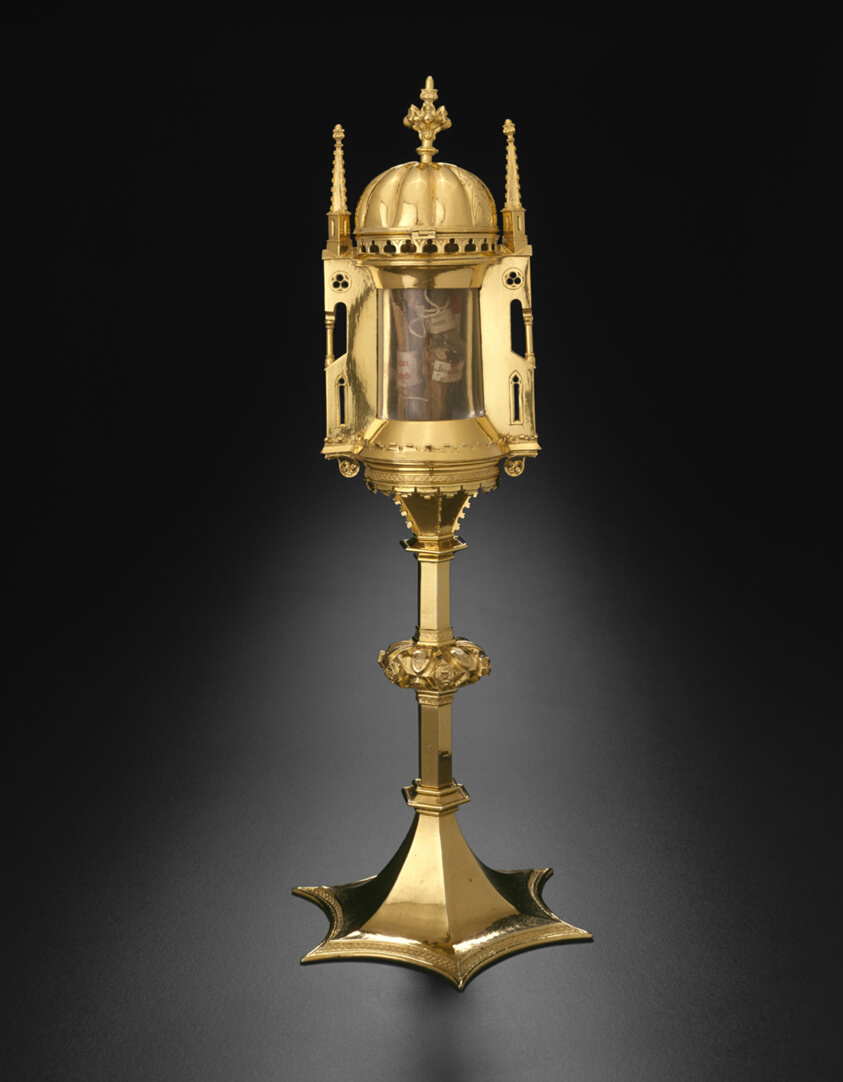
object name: Decorative Arts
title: Circular Reliquary with Domed Roof and Relics of Saints Godehard and Bernward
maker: German, Brunswick (Braunschweig)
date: 1375/1400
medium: Silver gilt and rock crystal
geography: Brunswick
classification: silver; metalwork; european decorative arts; decorative arts